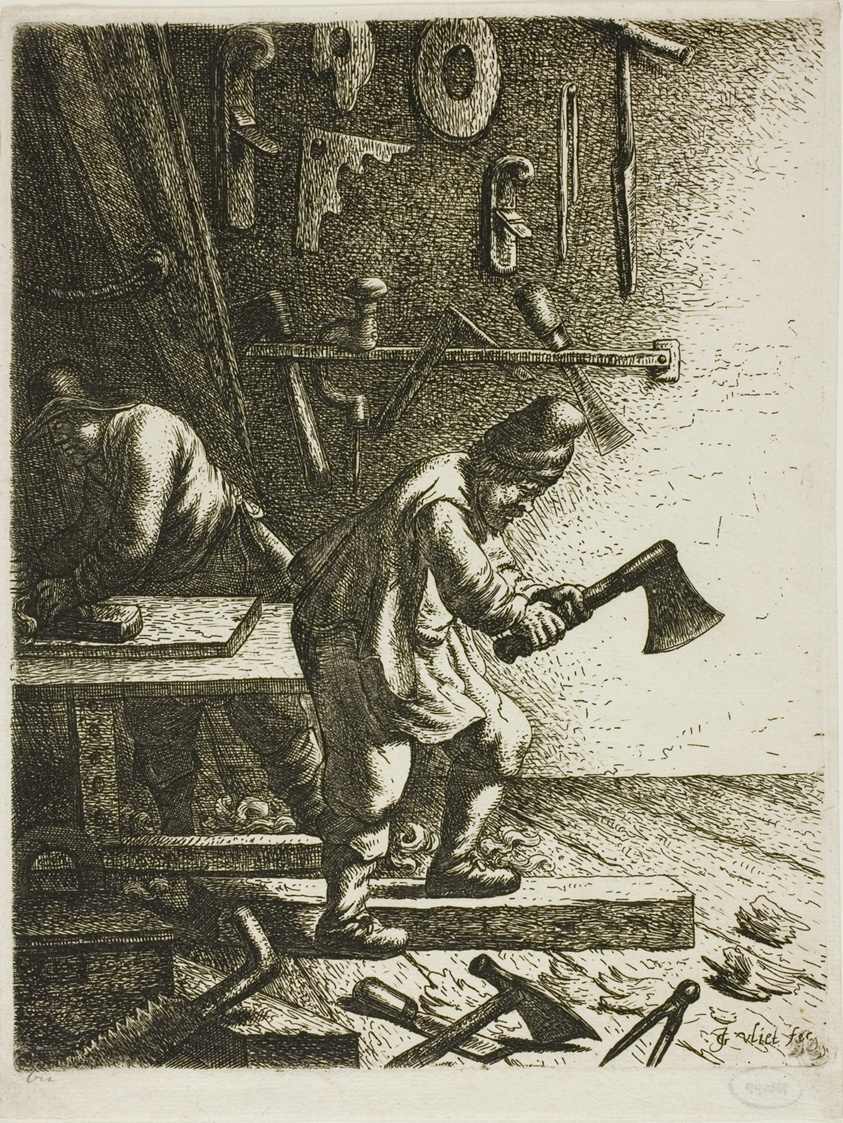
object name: Print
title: The Carpenter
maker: Jan Georg van Vliet; Dutch, c. 1610-after 1635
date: c. 1635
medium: Etching on paper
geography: Holland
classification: etching; print; prints and drawing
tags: labor, work